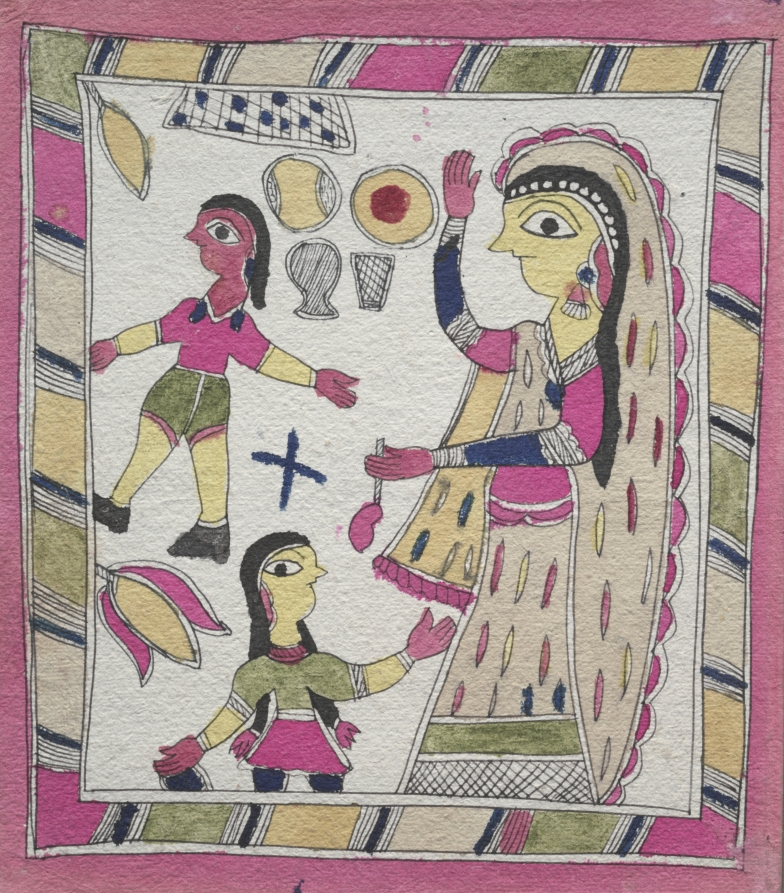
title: Three Figures: woman with two children playing ball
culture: Eastern India, Bihar State, Mithila or Madhubani School, 20th century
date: 1900s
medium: ink and color on paper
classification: Painting